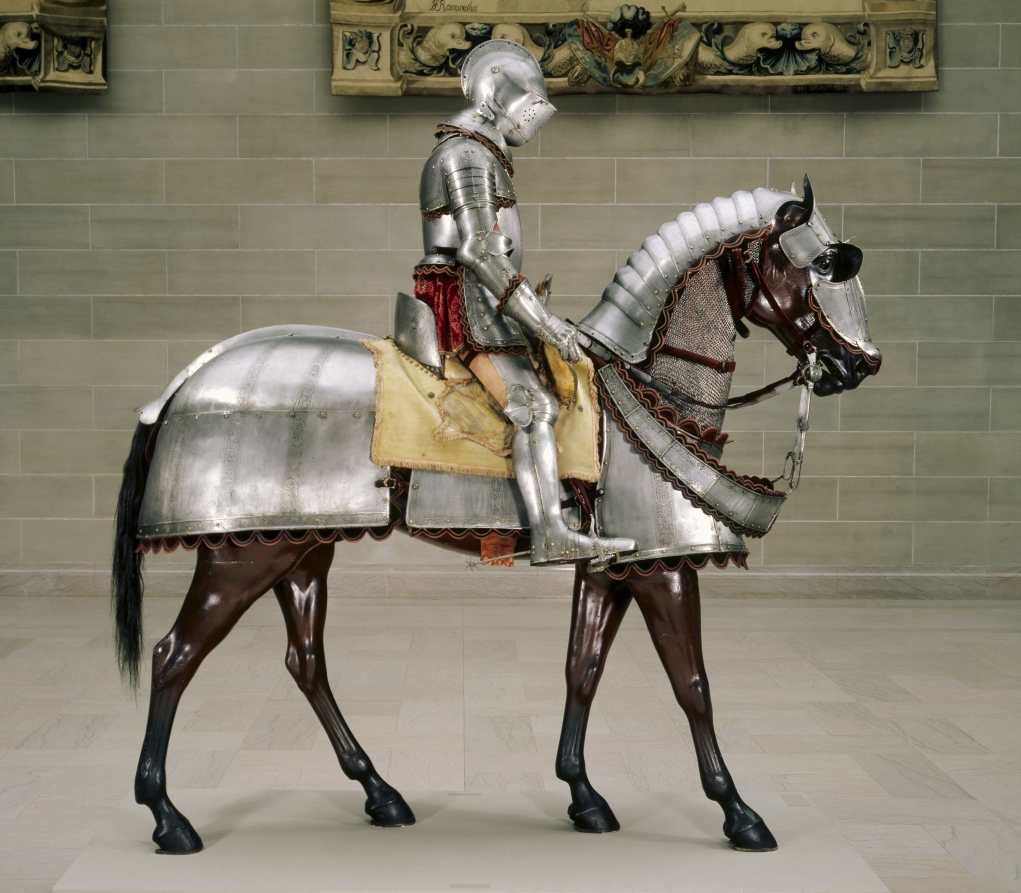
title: Armor for Man and Horse with Völs-Colonna Arms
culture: North Italy, 16th century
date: c. 1575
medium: steel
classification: Arms and Armor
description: A knight depended on his horse both as a weapon and a means of defense. He therefore had to take great care to protect his charger. From the 1100s on, knights first covered their steeds in trappings of fabric and later of mail. By around 1400, full steel plate armor for horses was complete. It is possible that this armor made for both man and horse originally belonged to a "garniture," an armor with multiple customized exchange elements that could convert the basic suit to various field and sporting uses. With different pieces of the garniture attached, this suit could have been worn either in battle or in various tournament games. The total combined weight of both the man's and horse's armor is 114 pounds. The etched decoration of this armor is of a type that became fashionable in northern Italy during the late 1500s. It consists of ornamental bands of etched figures, animals, portrait busts, and armor trophies. In addition, a coat of arms is represented seven times in different places—the center of the breastplate and blackplate, the front and back of each pauldron (shoulder defense), and the center of the peytral (horse's breastplate). The coat of arms is that of the Colonna family quartered with another, still unidentified family. It probably belonged to an unknown member of the Völs-Colonna family from the South Tyrol, now part of northern Italy.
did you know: The Vols-Colonna family crest is found seven times in prominent locations on this armor set for horse and rider.